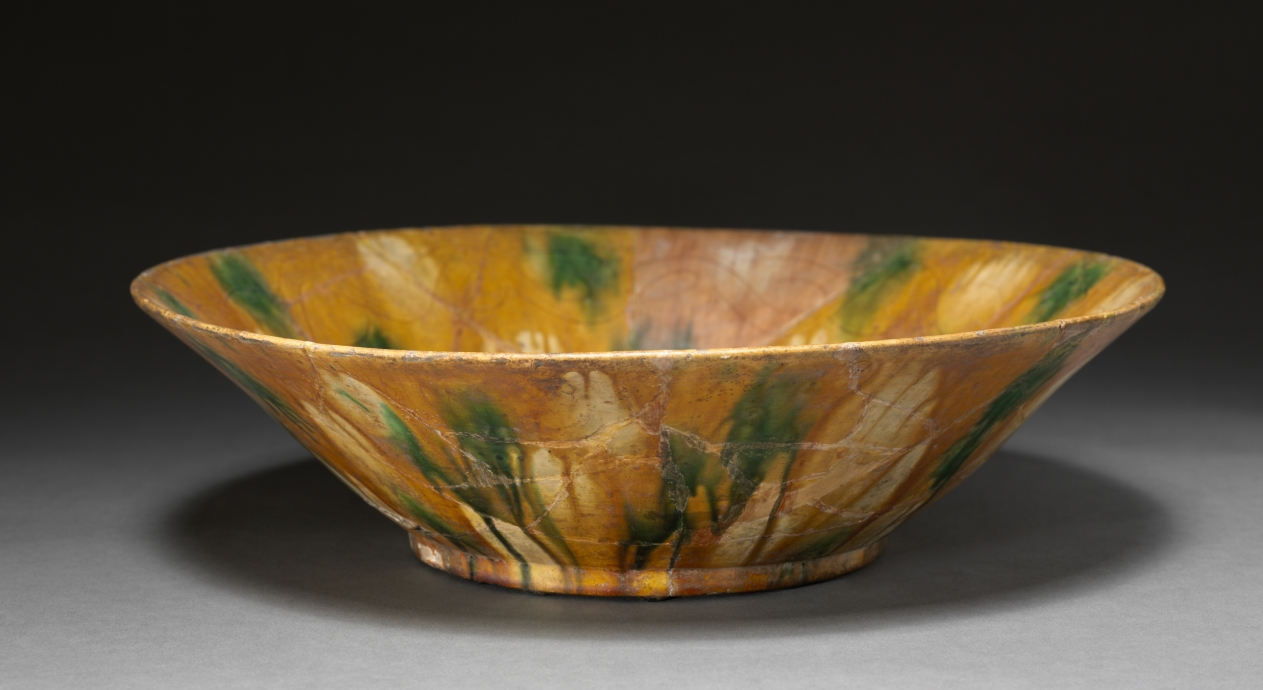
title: Bowl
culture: Iraq or Iran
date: 800s–900s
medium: earthenware with painted underglaze and incised design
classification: Ceramic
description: This large bowl with flaring sides is splashed with yellow, brown, and green pigments, which have run during the firing process, in imitation of Tang Chinese ceramics.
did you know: Look closely: the bowl has incised decoration of a large palmette in the center and a split-leaf scroll pattern just inside the rim.